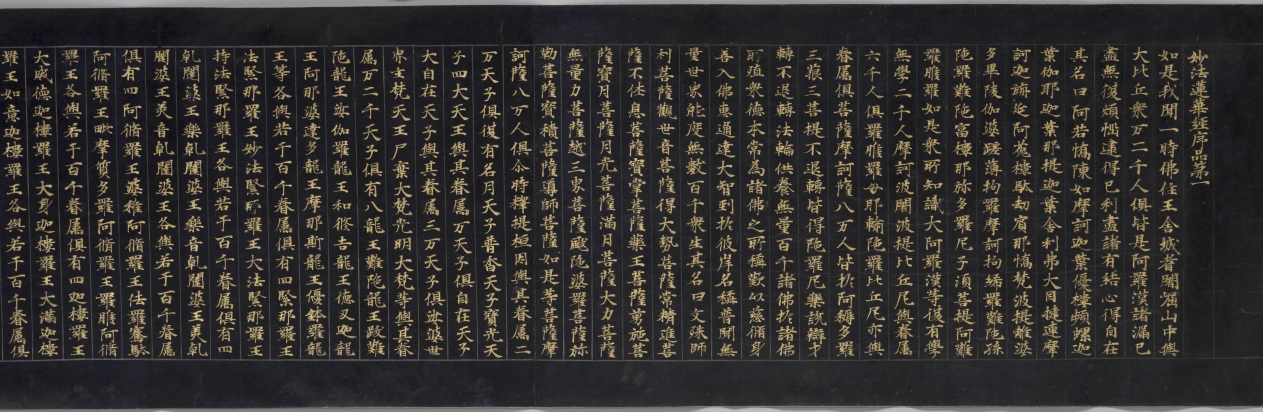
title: Lotus Sutra with a Frontispiece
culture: China, Song dynasty (960–1279)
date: late 1100s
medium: handscroll; gold ink on indigo sutra paper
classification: Painting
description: The frontispiece of this sutra, a sacred Buddhist scripture, illustrates episodes mentioned in the Buddha’s teaching. The sutra begins with a description of the historic Buddha Shakyamuni’s assembly on Vulture Peak. On the right, the Buddha sits amid members of his congregation: lohans (or arhats), bodhisattvas, gods, and other beings. The narrative proceeds from right to left. Heavenly light emanates from Shakyamuni’s brow to “illuminate the eighteen thousand worlds to the east.” Illustrated immediately below the ray is the sutra’s promise that if anyone carves or paints images of the Buddha “they will achieve the Buddha path.” The female figures in the frontispiece point to another promise made in this popular Mahayana school sutra, namely that female devotees and nuns who read the sutra are promised Buddhahood and salvation.